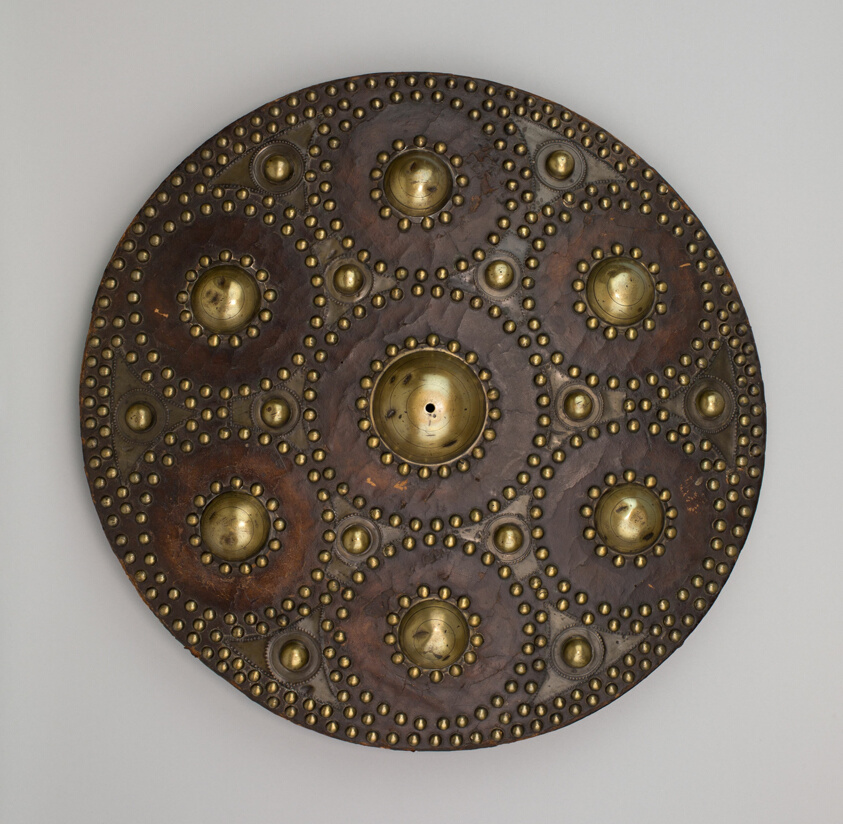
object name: Armor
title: Highland Targe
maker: Scottish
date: early 18th century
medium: Wood (fir), leather, and brass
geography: Scotland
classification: shield; armor; arms and armor